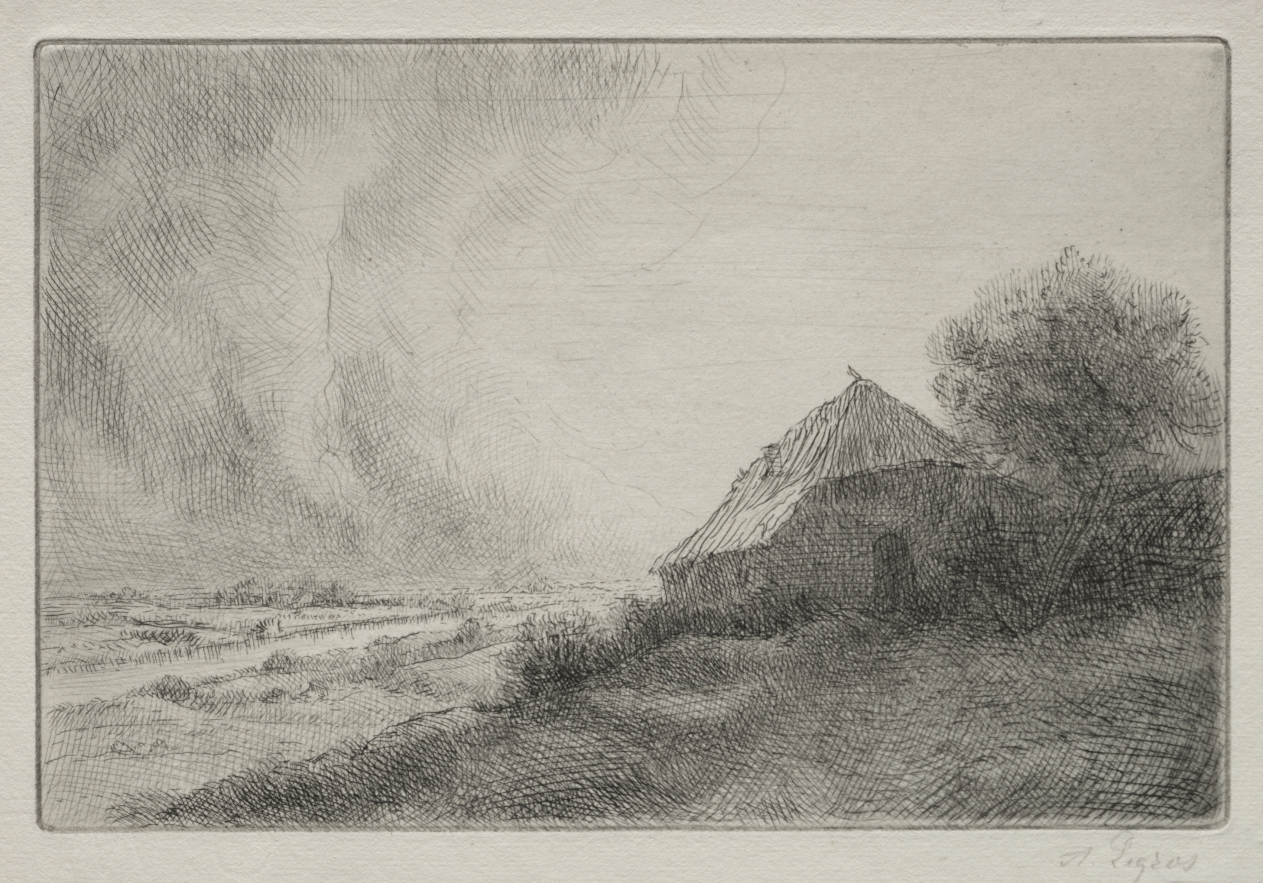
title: Ruined House on a Hillside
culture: France, 19th-20th century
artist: Alphonse Legros (French, 1837–1911)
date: c. 1857–1911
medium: etching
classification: Print